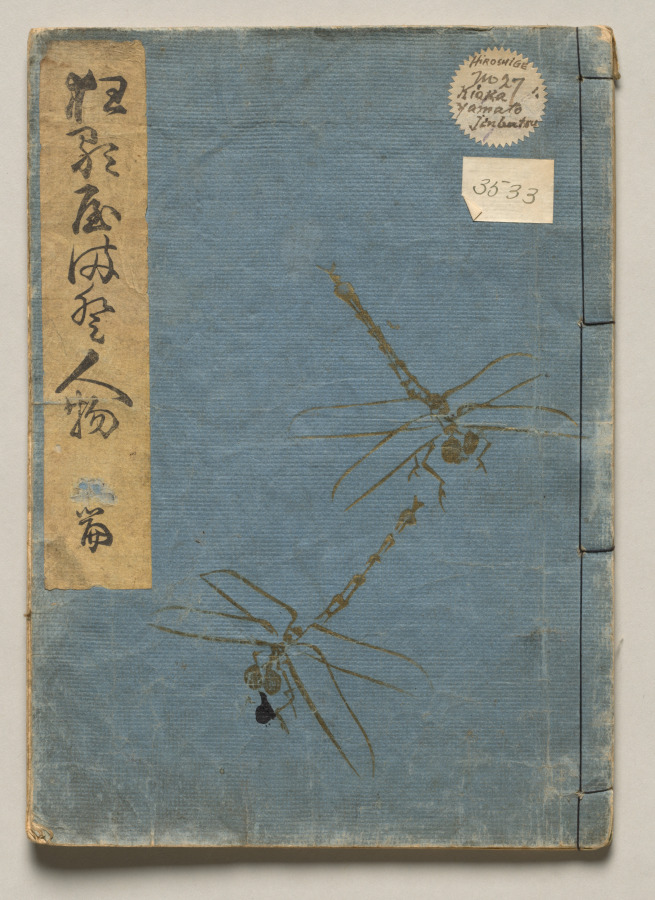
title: Volume Seven of People of Japan in Light Verse (Kyōka)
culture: Japan, Edo period (1615–1868)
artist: Utagawa Hiroshige (Japanese, 1797–1858)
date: 1857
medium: Woodblock-printed book; ink and color on paper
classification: Bound Volume